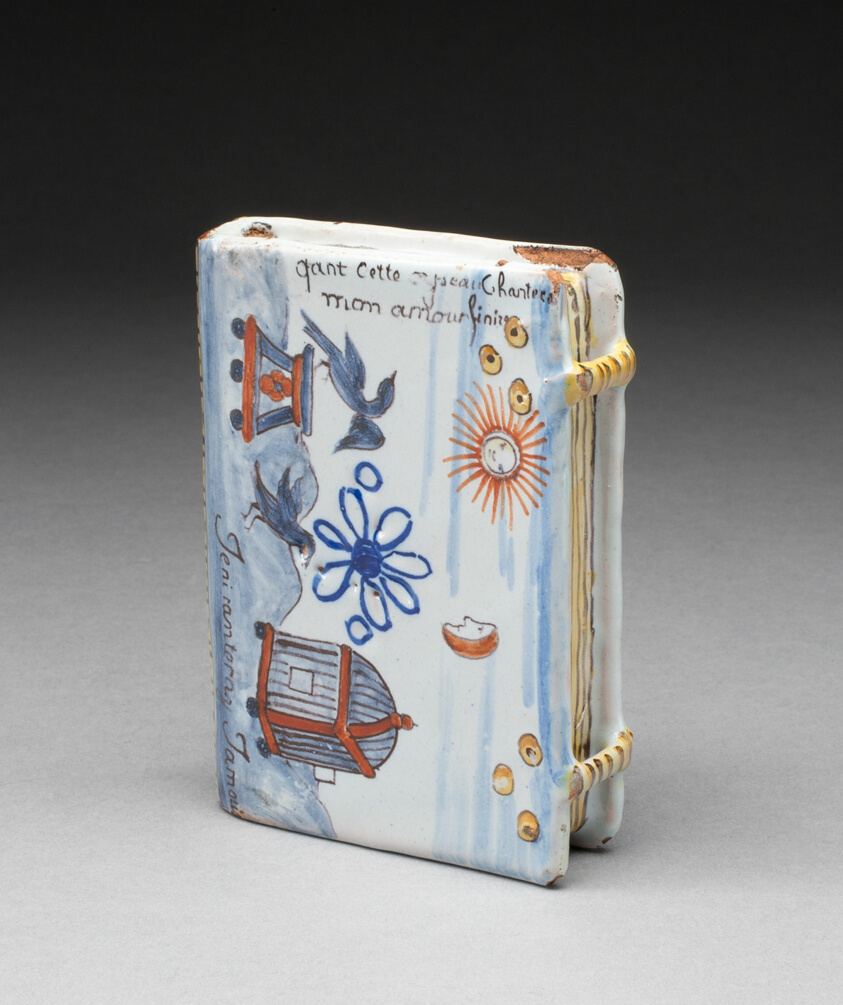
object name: Ceramics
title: Perfume Flask in the form of a Book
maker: France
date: c. 1780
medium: Tin-glazed earthenware (faience)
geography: France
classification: earthenware; european decorative arts; ceramics